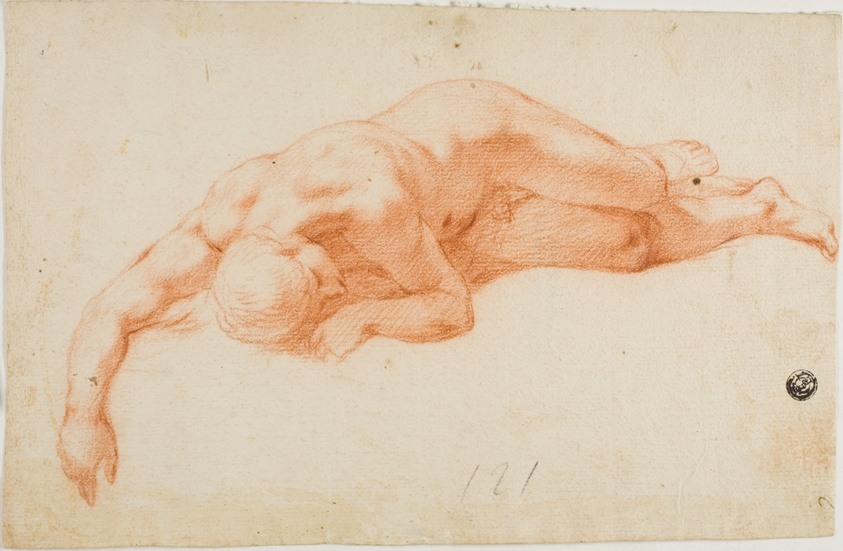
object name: Drawing and Watercolor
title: Reclining Nude Male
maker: Unknown Artist; Italian, 1500-1699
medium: Red chalk on ivory laid paper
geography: Italy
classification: chalk; drawings (visual works); prints and drawing